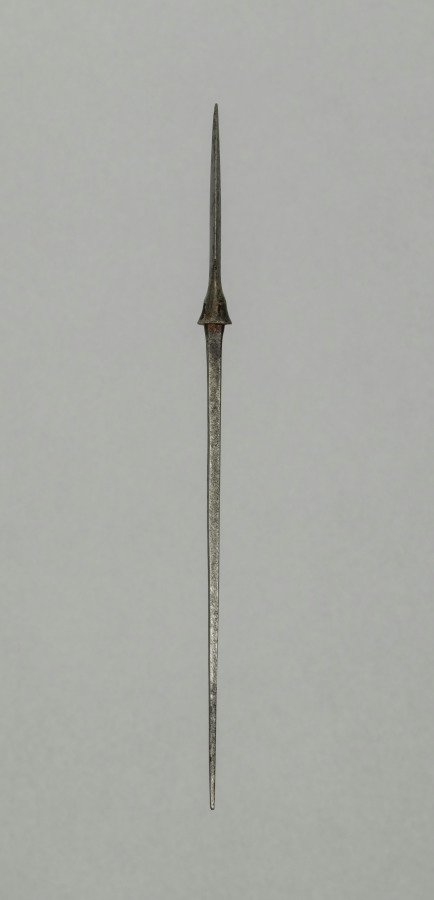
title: Arrow Point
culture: Japan, Edo period (1615–1868)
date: 1700s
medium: steel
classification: Arms and Armor